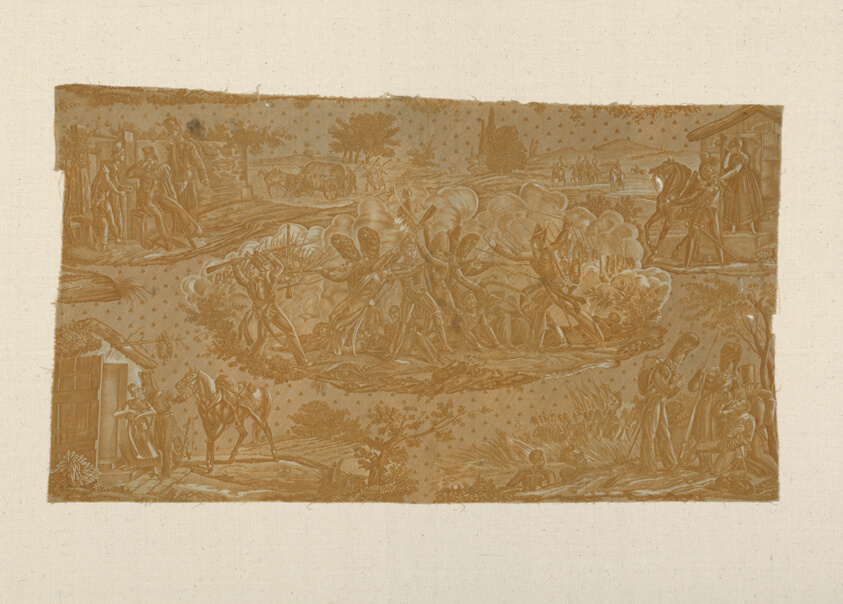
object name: Textile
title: Cambronne at Waterloo (Furnishing Fabric)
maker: Manufactured by Hartmann et Fils; France, Alsace, Munster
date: 1820/25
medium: Cotton, plain weave; engraved roller printed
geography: France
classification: textile; weaving - printed; furnishing textile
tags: propaganda